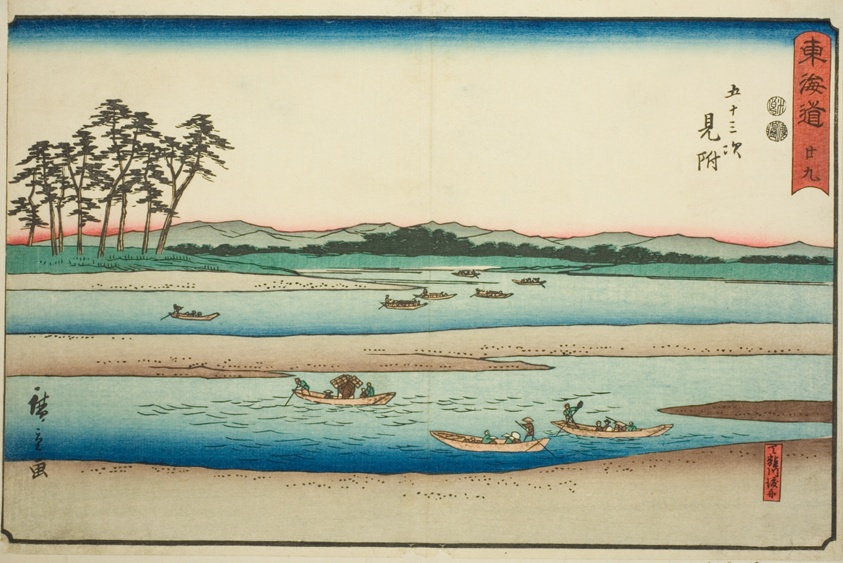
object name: Print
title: Mitsuke: Ferryboats on the Tenryu River (Mitsuke, Tenryugawa no funawatashi)—No. 29, from the series "Fifty-three Stations of the Tokaido (Tokaido gojusan tsugi)," also known as the Reisho Tokaido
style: Japanese (culture or style)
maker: Utagawa Hiroshige 歌川 広重; Japanese, 1797-1858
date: c. 1847/52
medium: Color woodblock print; oban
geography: Japan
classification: woodblock print; print; asian art